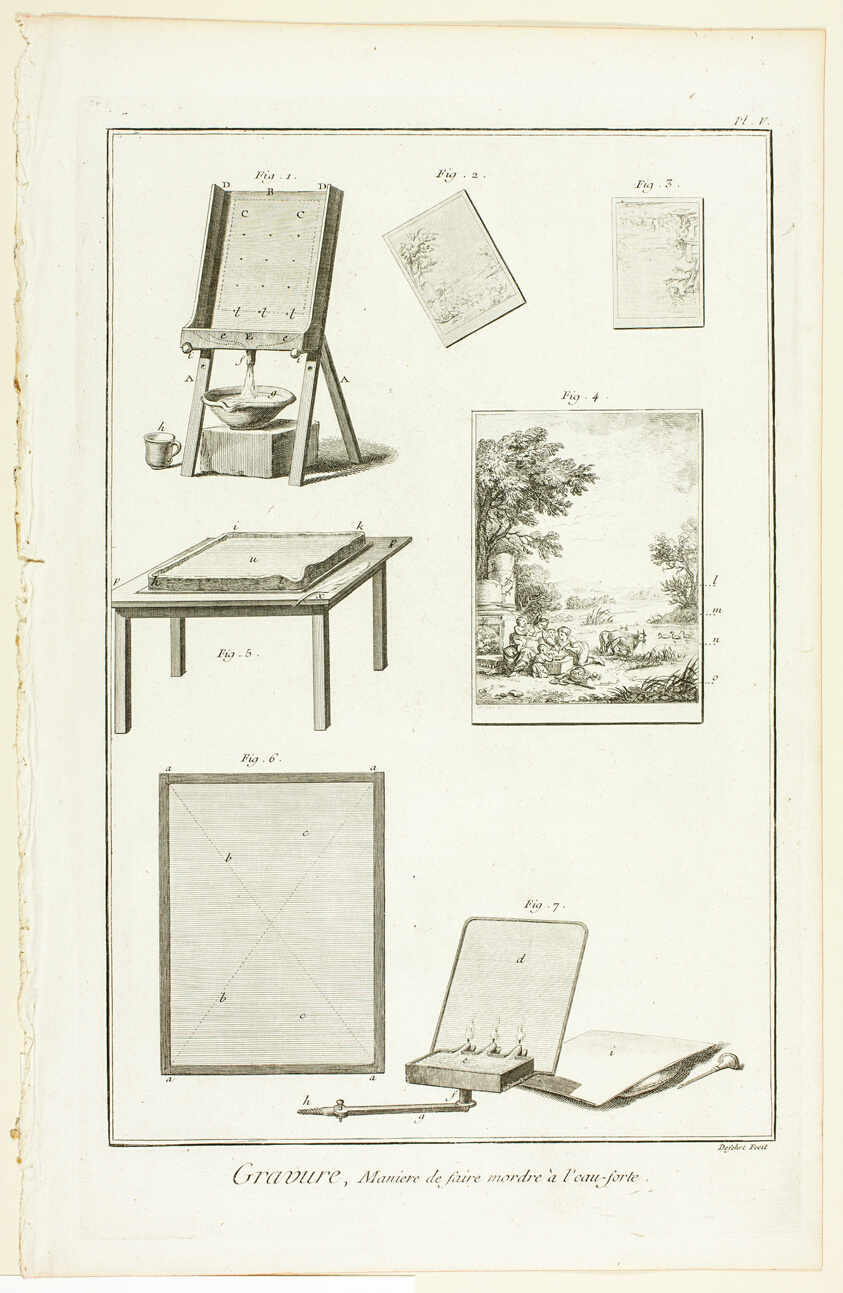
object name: Print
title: Etching: Biting the Plate, from Encyclopédie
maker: A. J. Defehrt (French, active 18th century); after Benoît-Louis Prévost (French, c. 1735-1809); published by André le Breton (French, 1708-1779), Michel-Antoine David (French, c. 1707-1769), Laurent Durand (French, 1712-1763), and Antoine-Claude Briasson (French, 1700-1775)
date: 1762/77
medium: Engraving on cream laid paper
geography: France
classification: etching; print; prints and drawing